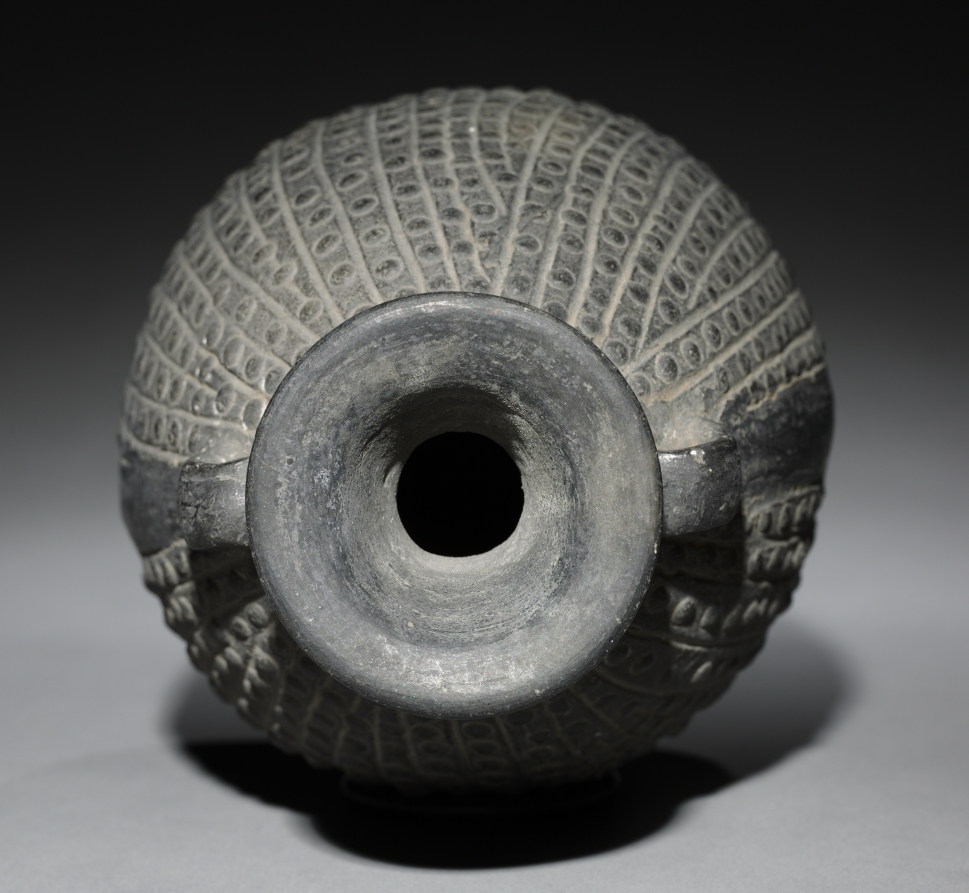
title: Darkware Vessel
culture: Peru, North Coast, Chimú style (900-1470)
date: late 1400s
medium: black ware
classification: Ceramic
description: Under the Chimú, whose empire stretched for 800 miles along the Peruvian north coast, the value of ceramics fell, perhaps because high-status vessels were made of precious metals. Accordingly, ceramics were mass-produced with molds and, rather than bearing painted scenes, often have an overall dark surface achieved by firing in a smoky atmosphere. This firing method was also used for very early Andean ceramics, including the example at the far left. We don't know whether the Chimú revived the method to venerate earlier cultures. The vessel with the stripped surface was made after the Chimú were conquered by the Inka in the late 1400s.